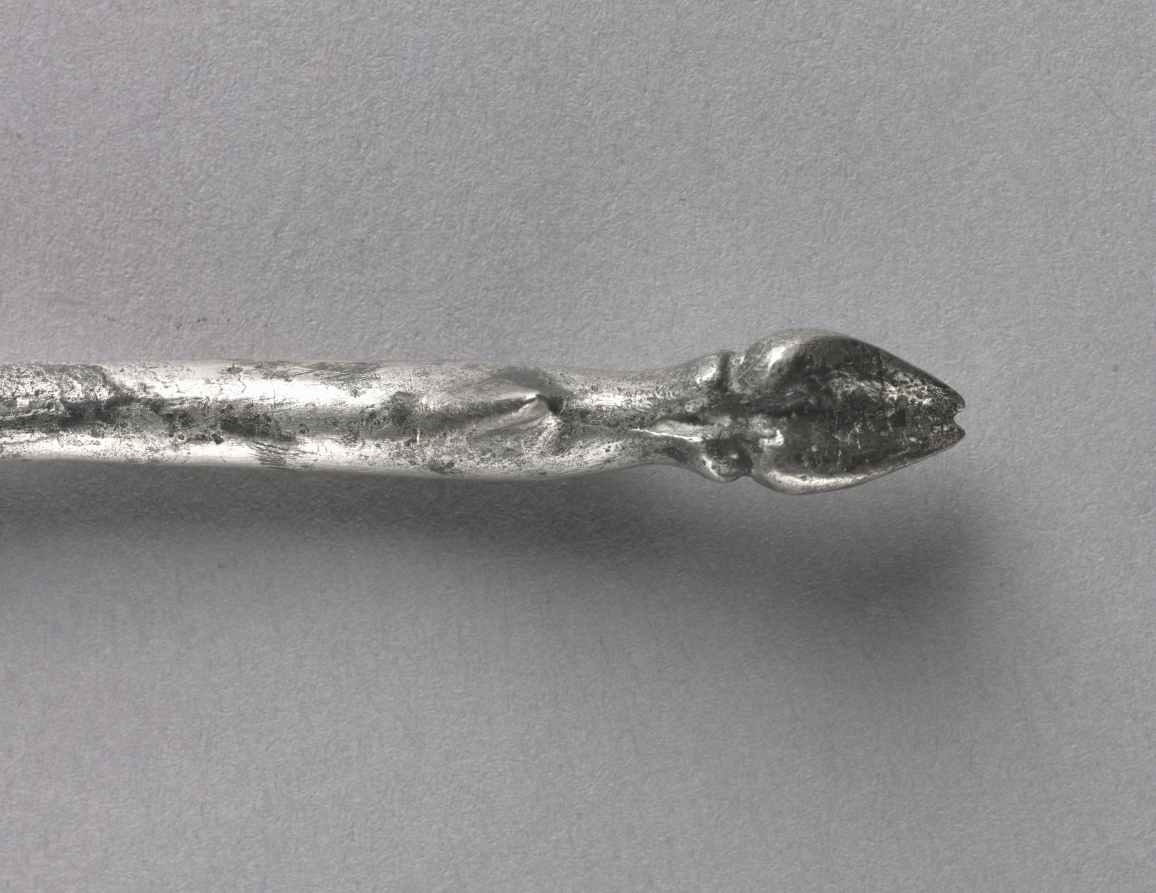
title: Fork with Animal Hoof Finial (Ornament)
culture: Byzantium, Syria(?), Byzantine period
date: 300s CE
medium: silver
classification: Metalwork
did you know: In the 10th century, forks like this one were common in Byzantium. During this same period in Western Europe, people usually ate with their fingers, thinking that forks were decadent.